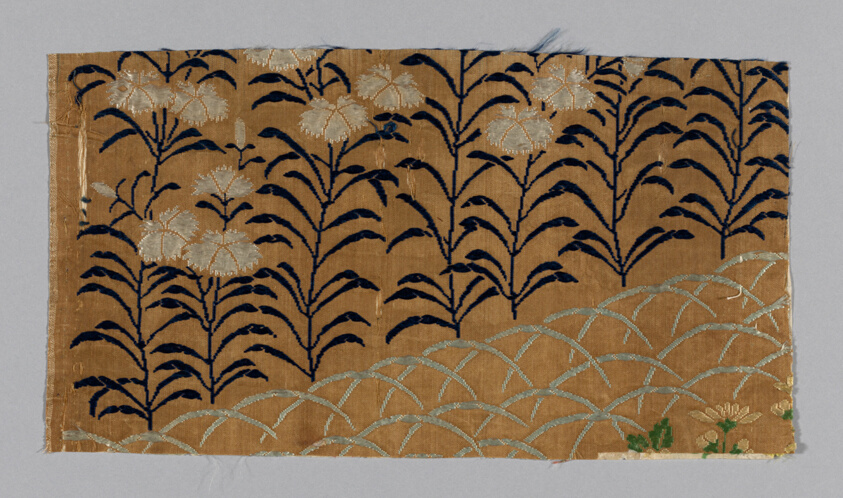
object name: Textile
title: Fragment (From a Noh Costume)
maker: Japan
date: 18th century, late Edo period (1789–1868)/ Meiji period (1868–1912)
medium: Silk, twill weave with supplementary patterning wefts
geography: Japan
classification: textile; weaving